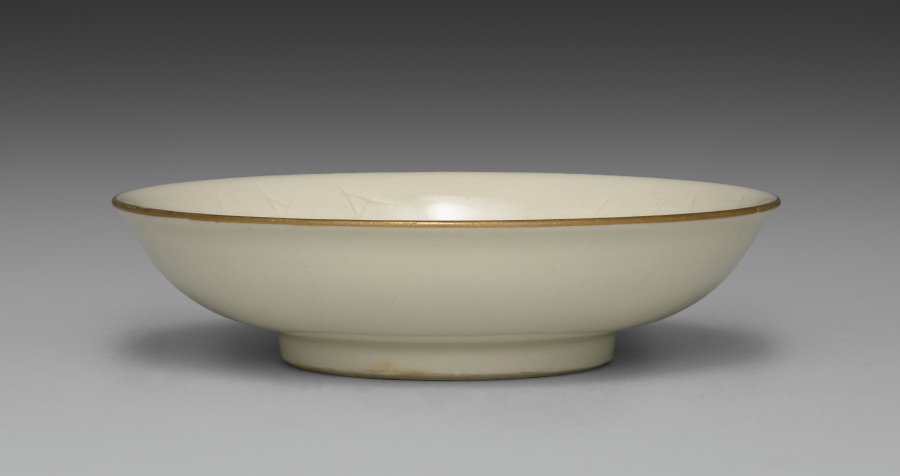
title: Small Dish from Dining Set with Plum Blossoms and Cracked-Ice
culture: Japan, Meiji period (1868–1912)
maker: Seifū Yohei II (Japanese, 1844–1878)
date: c. 1875–78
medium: Porcelain with molded designs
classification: Ceramic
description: Each item in this set has a delicate low-relief design of flowering plum branches over scattered, intersecting lines meant to resemble the cracked-ice surface of a frozen body of water and is signed on the base in gold pigment. While Yohei II produced many fine works in underglaze blue, like those produced by Kiyomizu Shichibei, he also made works in quite different styles later in his career, from the early 1870 s. In 1873, he was appointed purveyor to the Industrial Center of Kyoto Prefecture, a designation associated with Kyoto’s efforts to reach an international market through the port of Kobe; and from 1875 until his death, he was involved in national-level projects to present Japanese ceramics across the world. It was during this period that Yohei III was apprenticed to Yohei II, and it has been suggested that this set may in fact be an early example of Yohei III’s work, which he signed with his teacher’s name. Decorated with flowers resembling Japanese textile motifs, the set calls to mind the design of Yohei II’s pair of vases with plum blossoms in the Victoria and Albert Museum. Here, the elaborate trees created for a formal public exhibition setting have been translated into the approachable blossoms of the genteel domestic environment. While the designs are consistent across the pieces, each raised flower petal and pistil and each incised line in the ice was done by hand, so the cups, bowls, and dishes are similar yet unique. The bottoms of two boxes once identified the set’s owner, but the information has been deliberately obscured with black ink. However, inscriptions still visible appear to indicate two occasions, once at the end of July 1886 , and once again in June 1916 , when parts of the set were requested from Hokura in Niigata Prefecture. The location corresponds to a neighborhood in the present-day city of Jōetsu. The surname Tsuji 辻 also appears on a paper tag affixed to one of the box cloths. Future research may possibly reveal more about their provenance. A vase by Yohei III in a private collection combines the formal grandeur of the Yohei II vases in the Victoria and Albert Museum with the gentler design of this dining set, placing flowering plum trees against soft, scalloped-edge clouds resembling those in golden screens.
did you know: The dining wares have a creamy white coloration that the four boxes containing them identify as Korean in style.